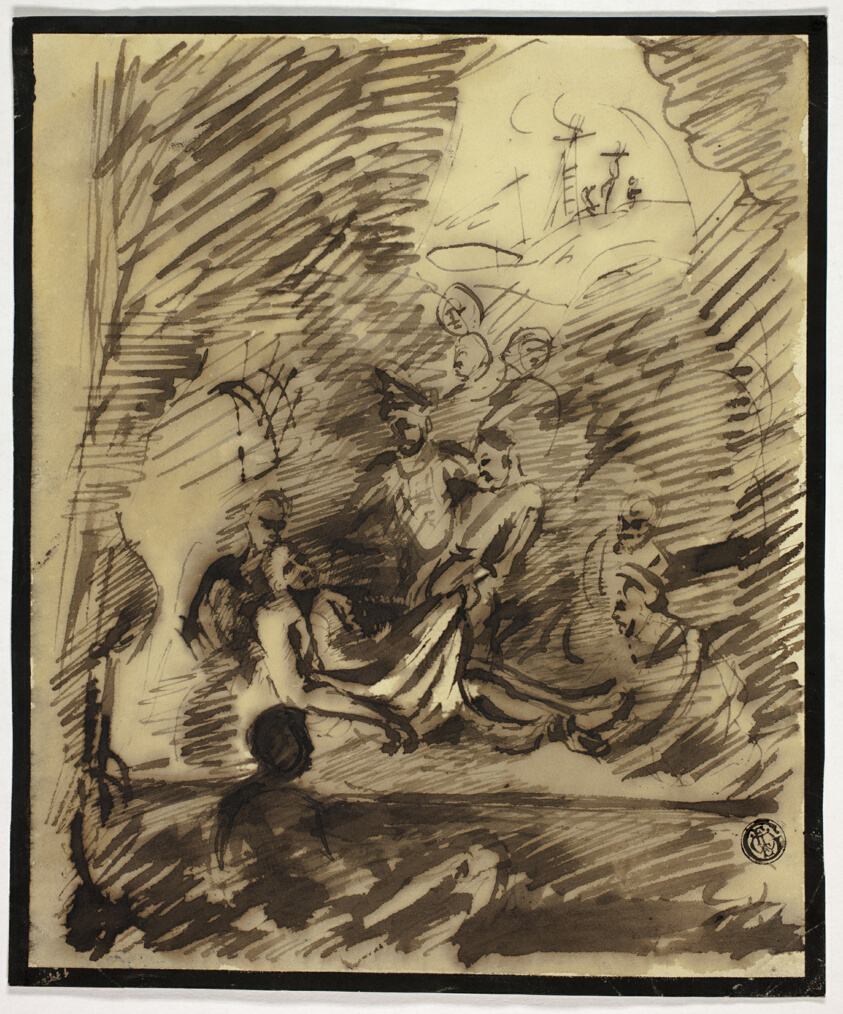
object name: Drawing and Watercolor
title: Entombment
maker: Attributed to Samuel William Reynolds, the elder; English, 1773-1835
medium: Pen and brown ink, with brush and brown wash, on cream wove paper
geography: England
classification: pen and ink drawings; drawings (visual works); prints and drawing